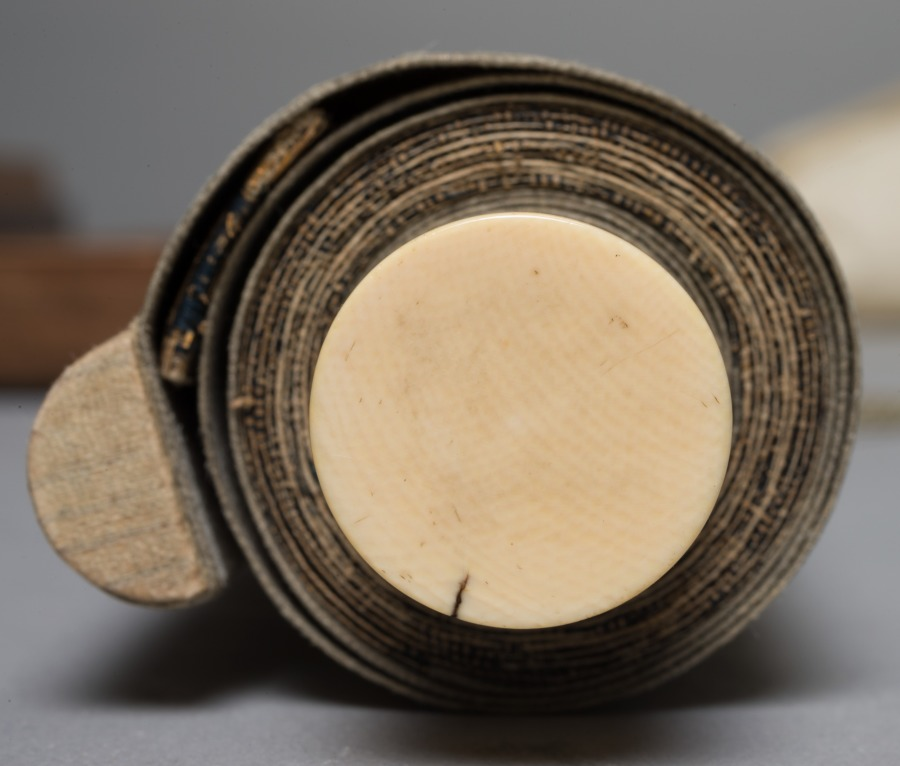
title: Landscape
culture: Japan, possibly Edo period (1615-1868)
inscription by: copy after Ishō Tokugan (Japanese, c. 1359–1437)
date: early 1600s to mid-1800s?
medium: hanging scroll; ink and slight color on paper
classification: Painting